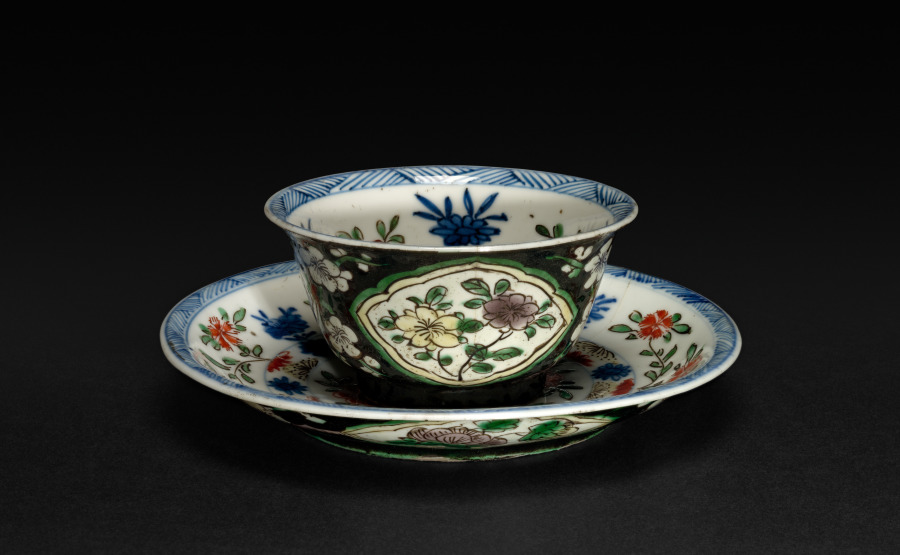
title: Cup and Saucer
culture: China, Qing dynasty (1644-1911), Kangxi reign (1662-1722)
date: 1662–1722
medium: porcelain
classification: Ceramic